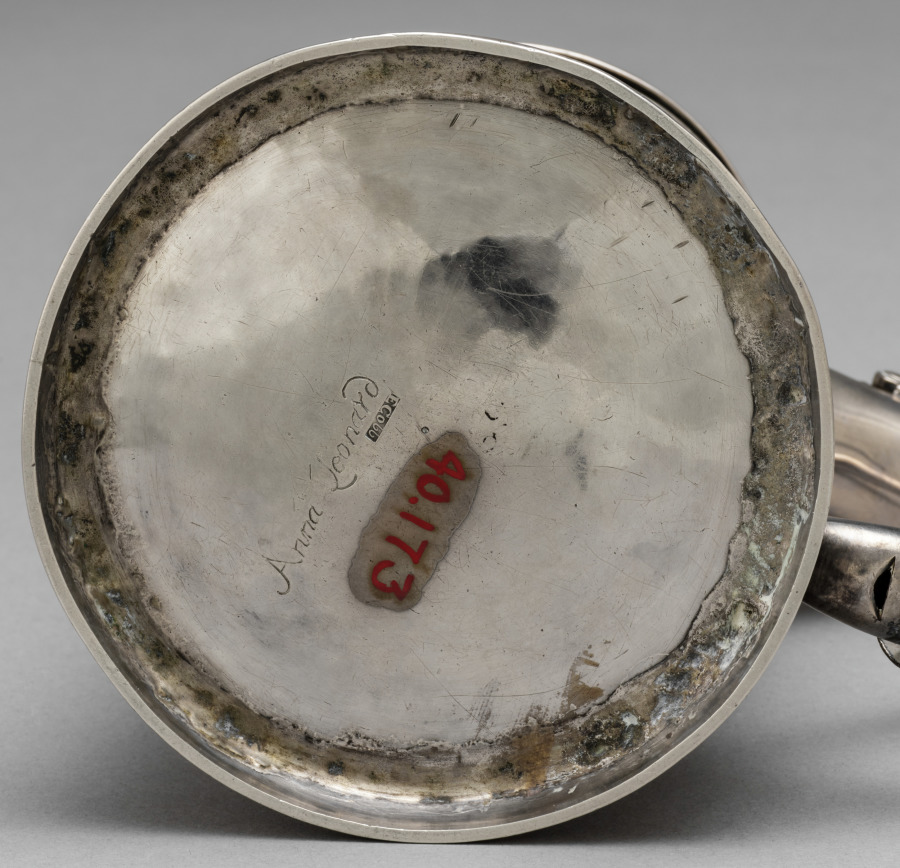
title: Tankard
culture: America, Massachusetts, Plymouth, 18th century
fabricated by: Ephraim Cobb (American, 1708–1775/77)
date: c. 1730–1740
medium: silver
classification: Silver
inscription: engraved "A * L" in block letters on top of handle, and "Anna Leonard" on bottom.